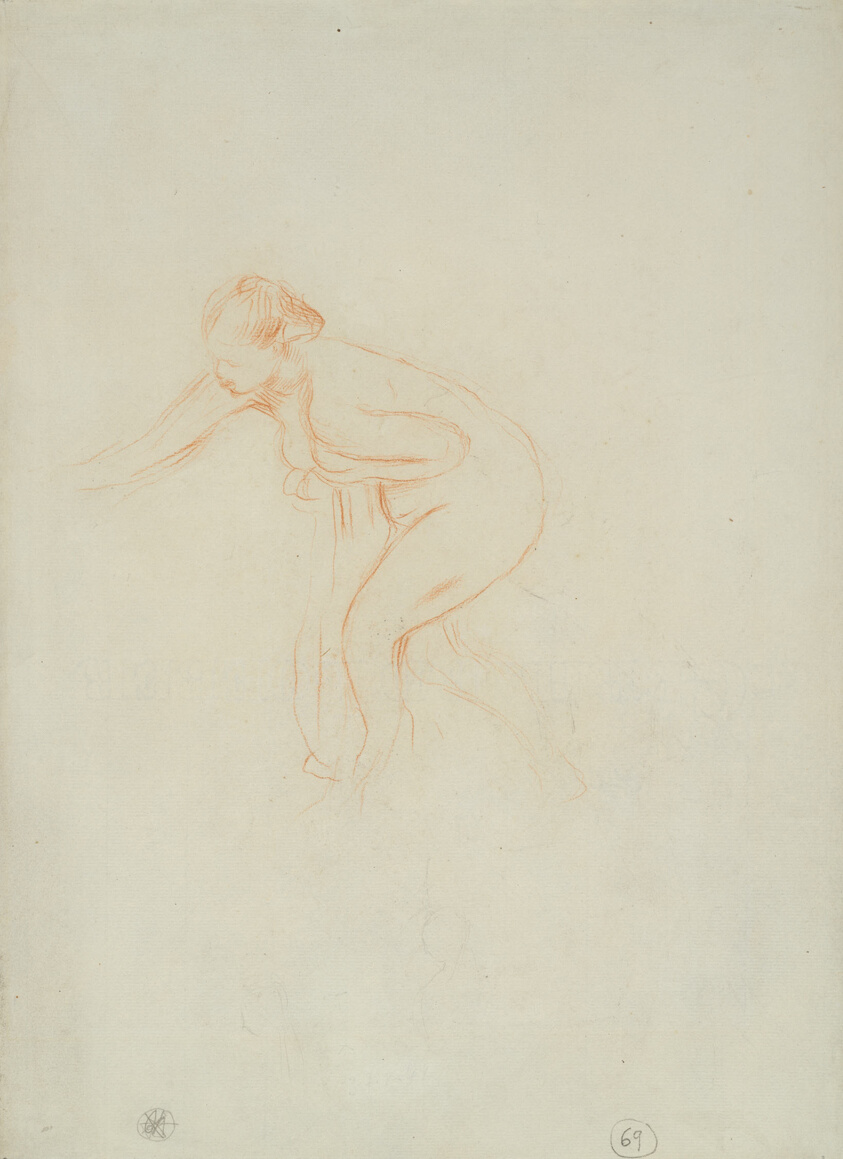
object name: Drawing and Watercolor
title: Bather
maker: Pierre Auguste Renoir; French, 1841-1919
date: c. 1885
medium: Red chalk, with traces of graphite, on cream laid paper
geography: France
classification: chalk; drawings (visual works); prints and drawing